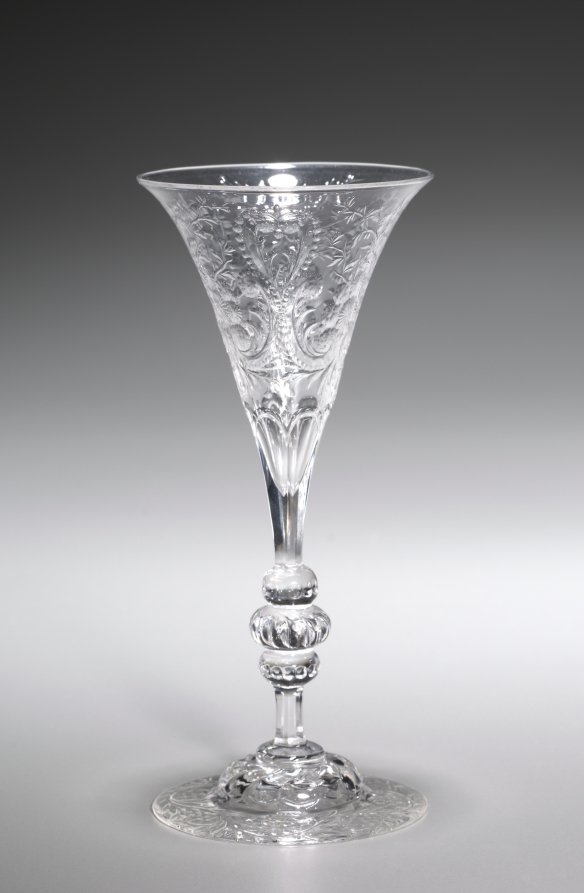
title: Glass from a Place Setting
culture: probably America, late 19th-early 20th century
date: c. 1890–1920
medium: glass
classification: Glass